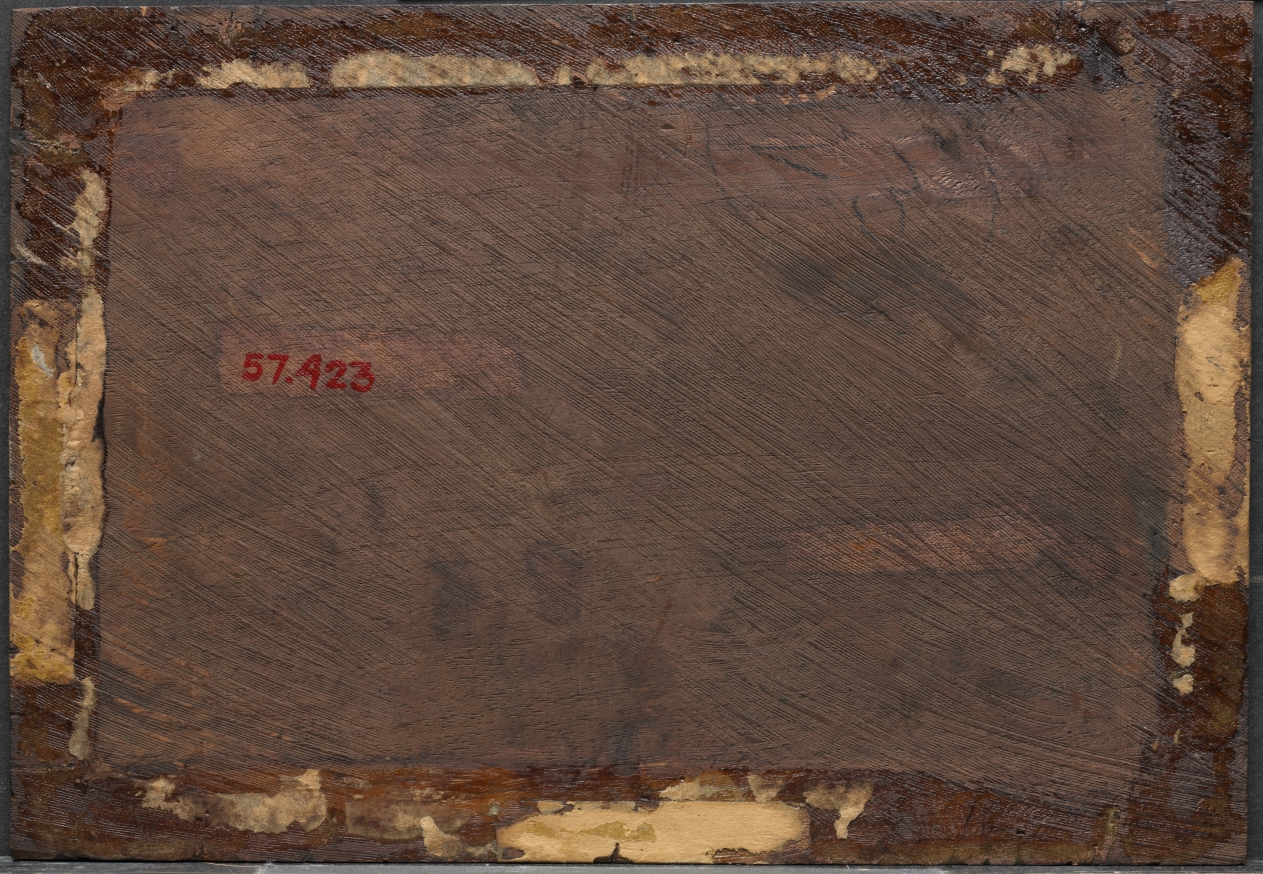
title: Gray Day on the Bay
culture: America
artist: William Merritt Chase (American, 1849–1916)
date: c. 1886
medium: oil on wood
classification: Painting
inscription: signed lower right: WM M. Chase [WM in monogram]